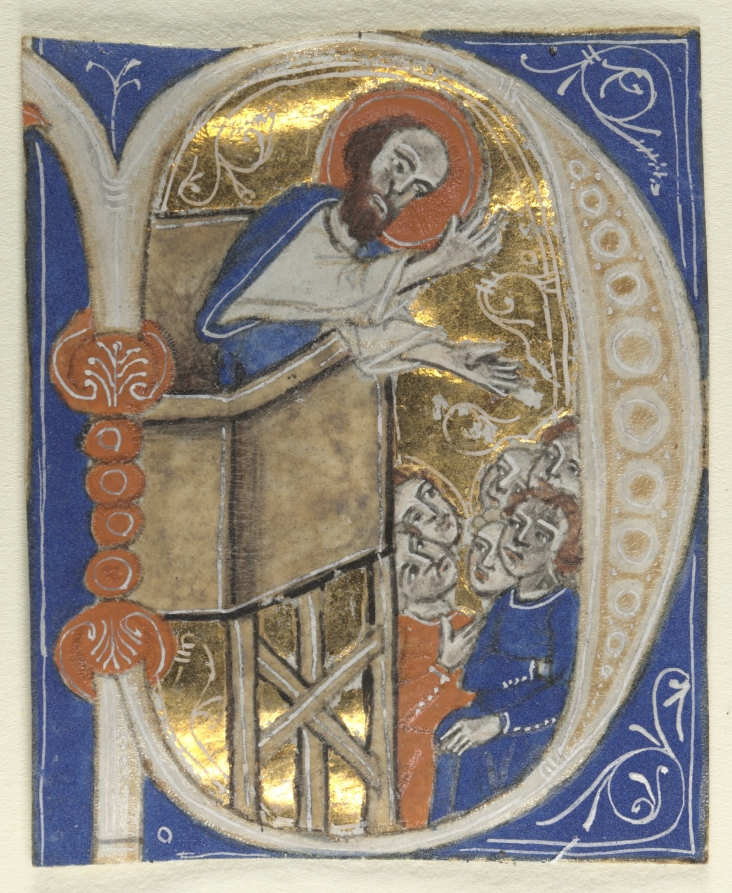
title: Historiated Initial Excised from a Bible: St. Paul Preaching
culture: Italy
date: 1200s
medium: tempera and gold on parchment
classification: Manuscript